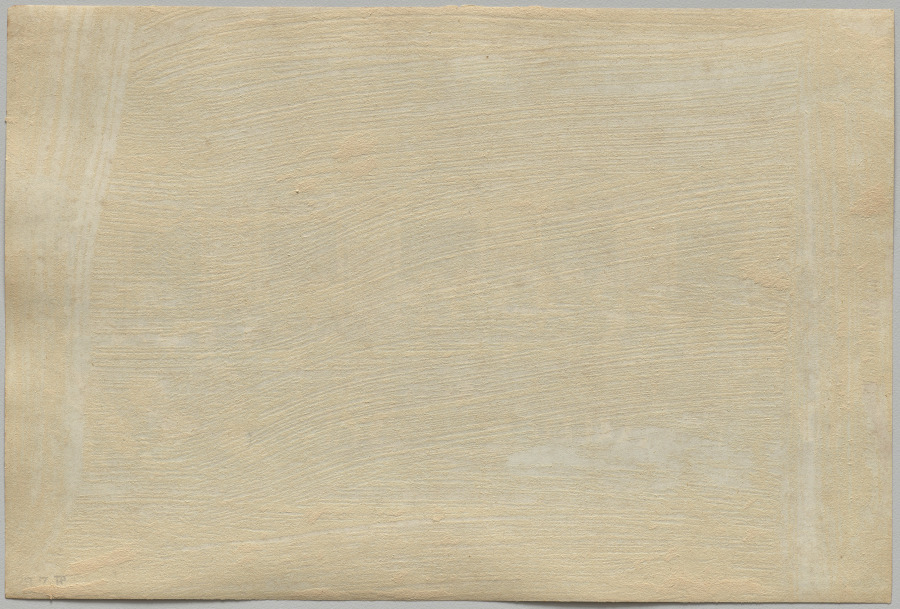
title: Maharaja of Scindia, nobles, and high officials, Gwalior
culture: India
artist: Raja Deen Dayal (Indian, 1844–1905)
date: c. 1882–87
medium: albumen print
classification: Photograph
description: These photographs are part of an album, now disassembled, of around 105 photographs taken in India between 1885 and summer 1887 that provide glimpses into the lives of the British colonial elite and royal and upper-class Indians. The museum holds another group of 37 pictures from this album (2016.266), which was probably commissioned by a British civil servant visiting or working in India around 1888 as a personal souvenir of his experiences there.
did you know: Raja Deen Dayal is regarded now, and was considered during his lifetime, to be India’s most important 19th-century photographer.